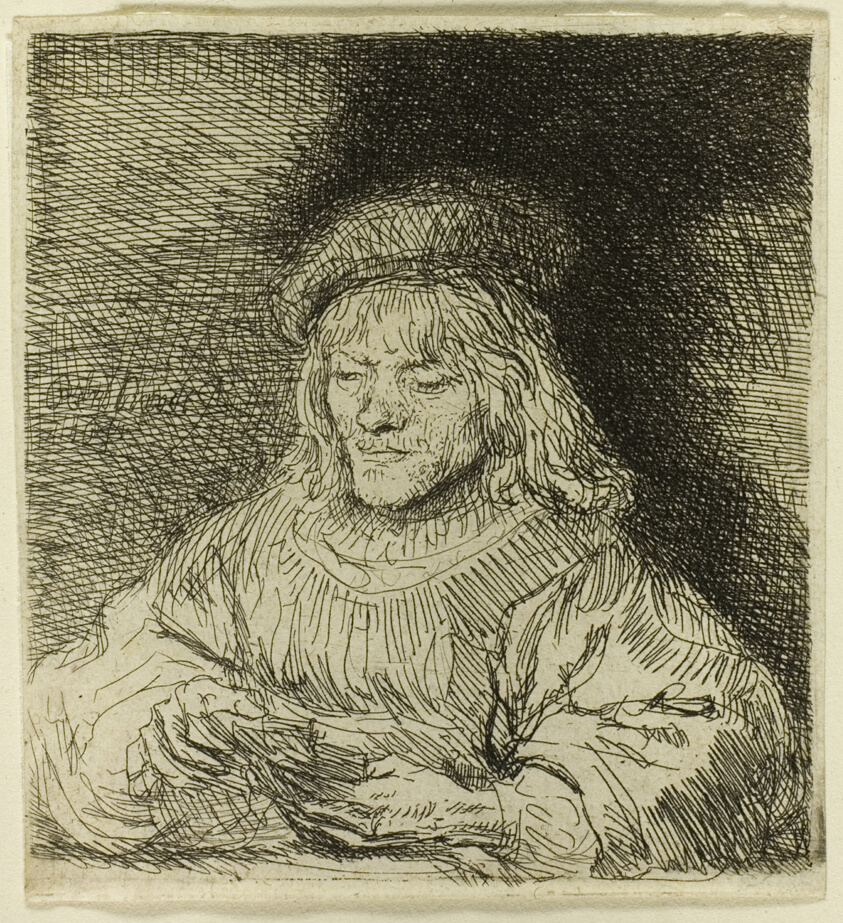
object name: Print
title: The Card Player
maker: Rembrandt van Rijn (Dutch, 1606-1669)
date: 1641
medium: Etching on paper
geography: Holland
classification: etching; print; prints and drawing; paper